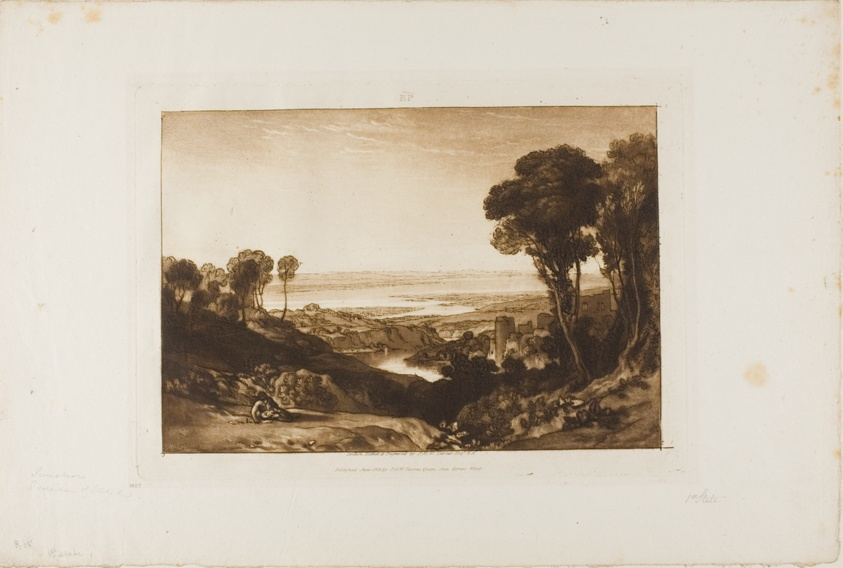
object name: Print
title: Junction of Severn and Wye, plate 28 from Liber Studiorum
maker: Joseph Mallord William Turner (English, 1775-1851)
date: published June 1811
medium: Etching and engraving on ivory paper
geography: England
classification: etching; print; prints and drawing